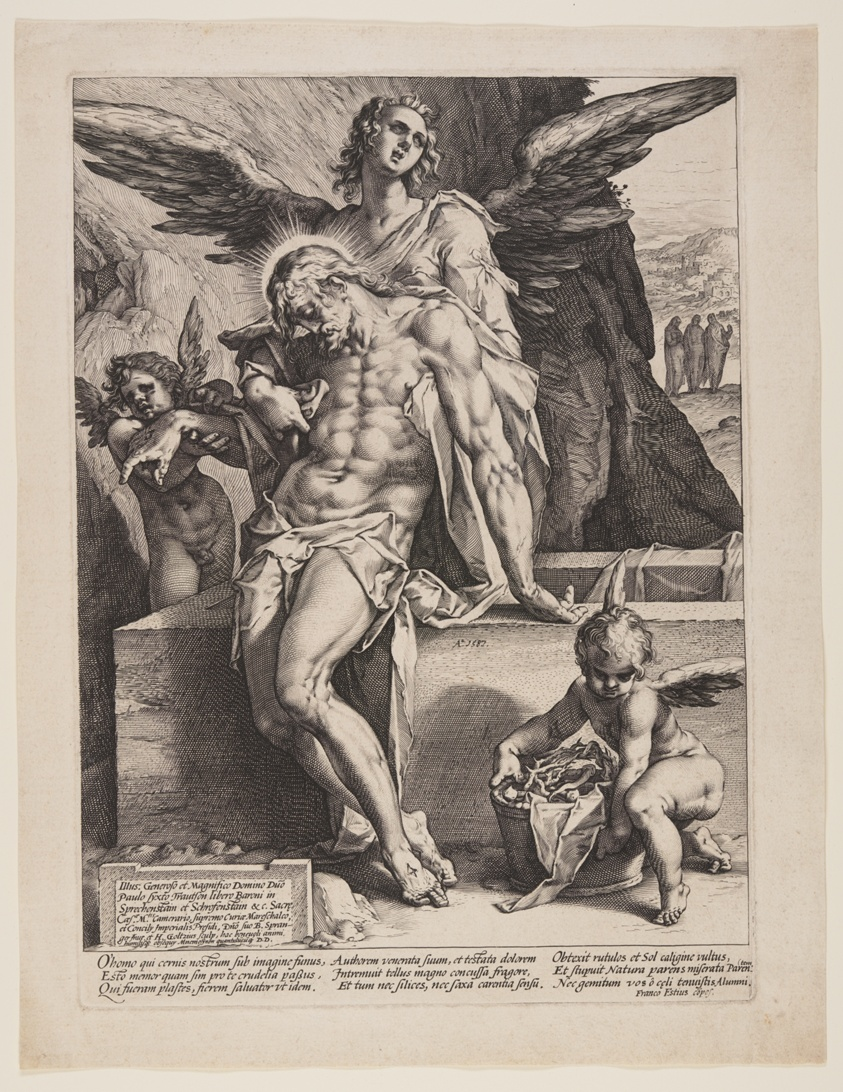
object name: Print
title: The Dead Saviour Supported by an Angel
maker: Hendrick Goltzius (Dutch, 1558–1617); after Bartholomeus Spranger (Flemish, 1546–1611)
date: 1587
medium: Engraving on ivory laid paper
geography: Netherlands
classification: print; paper; prints and drawing; engraving